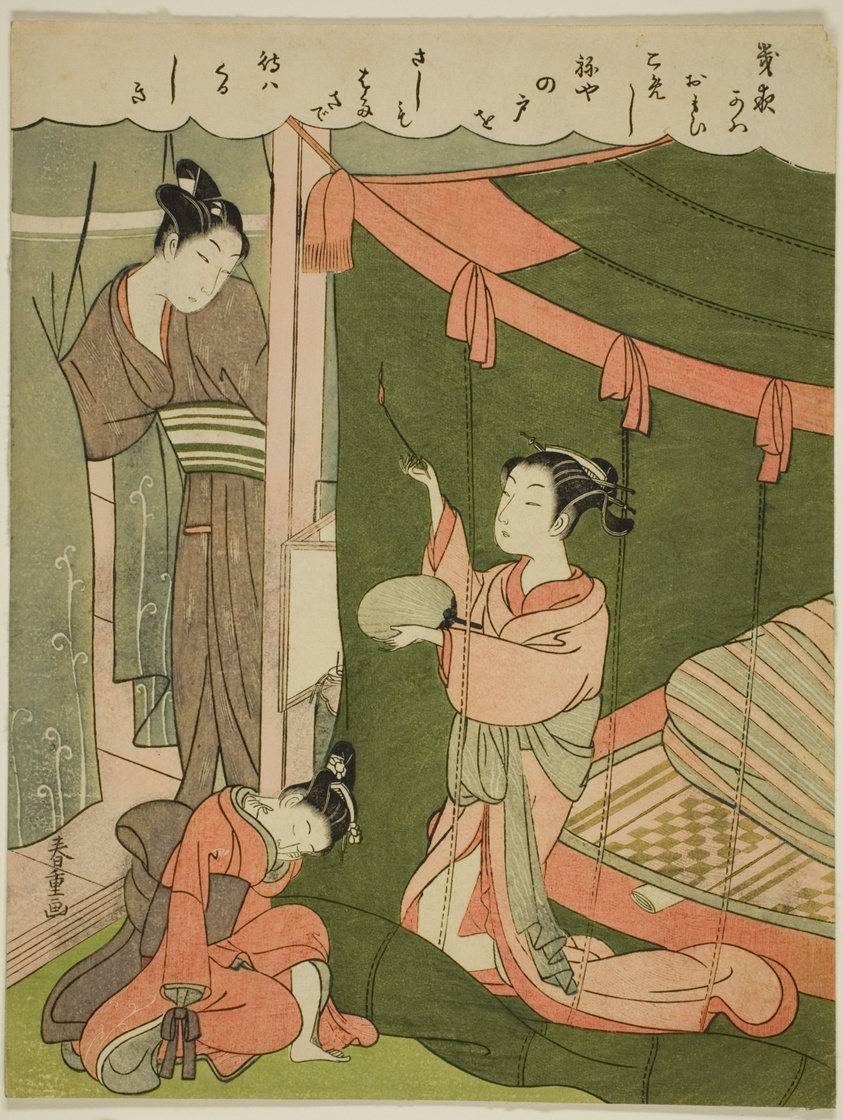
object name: Print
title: Courtesan Burning Mosquitoes as Her Guest Arrives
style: Japanese (culture or style)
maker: Shiba Kokan (Suzuki Harushige); Japanese, 1747–1818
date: c. 1772/73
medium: Color woodblock print; chuban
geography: Japan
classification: woodblock print; print; asian art